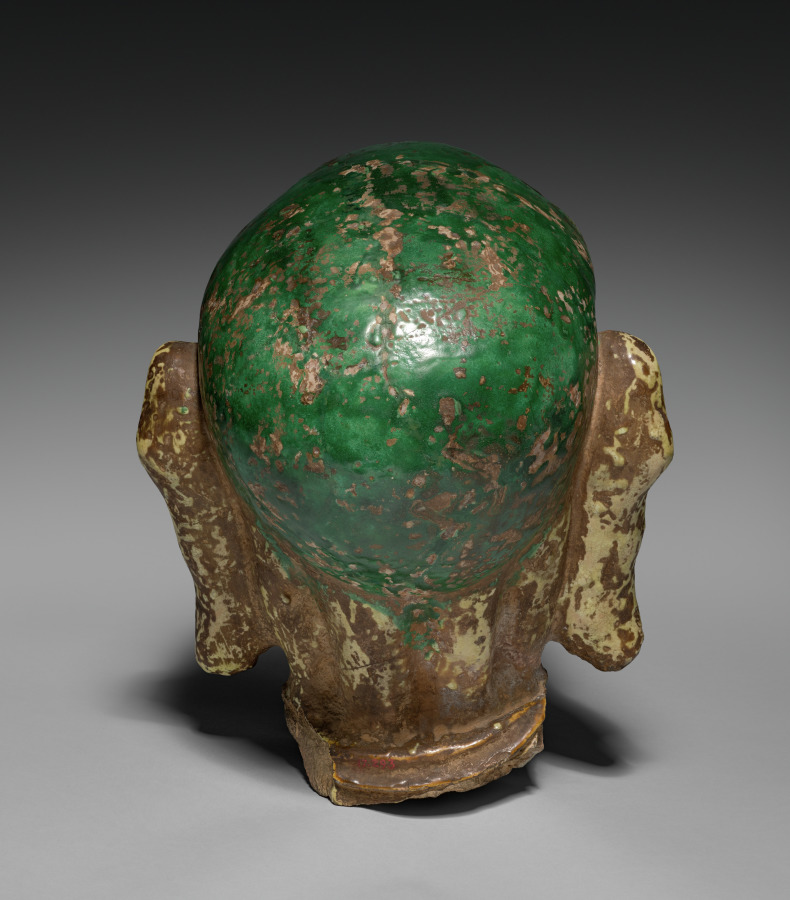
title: Head of a Lohan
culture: China, Ming dynasty (1368–1644)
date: 1368–1644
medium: earthenware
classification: Sculpture